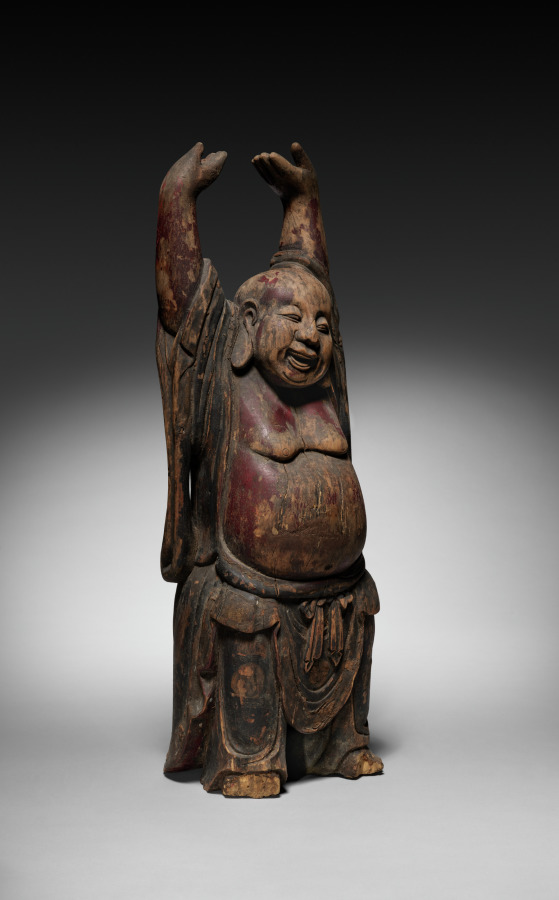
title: The Monk Budai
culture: China, Ming dynasty (1368–1644)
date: 1400s–1500s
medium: wood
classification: Sculpture